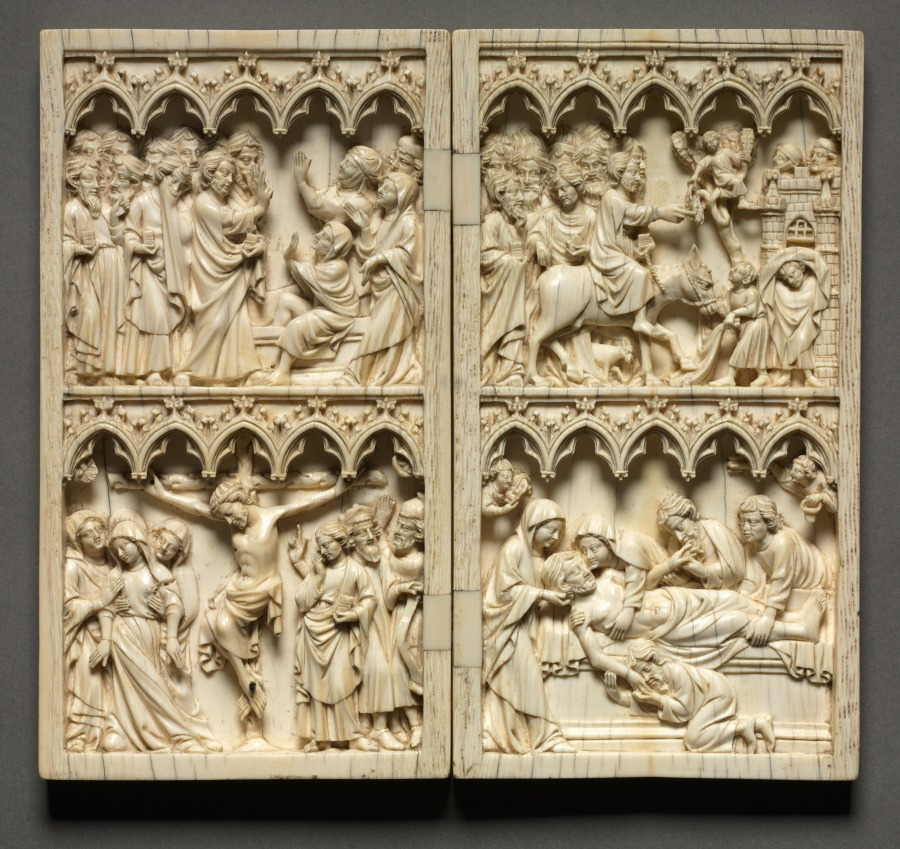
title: Diptych with Scenes from the Life of Christ (left wing: Raising of Lazarus and Crucifixion) (right wing: Entry into Jerusalem and Entombment)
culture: Germany, Thuringia or Saxony, 14th century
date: c. 1350–1375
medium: ivory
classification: Ivory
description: Ivory diptychs (two panels hinged together) were used for private devotion by their aristocratic owners. The scenes represented here are Christ’s Entry into Jerusalem, the Raising of Lazarus, the Crucifixion, and Christ’s Entombment. They suggest choices made by the original owner who wished to contemplate these aspects of Christ’s passion.